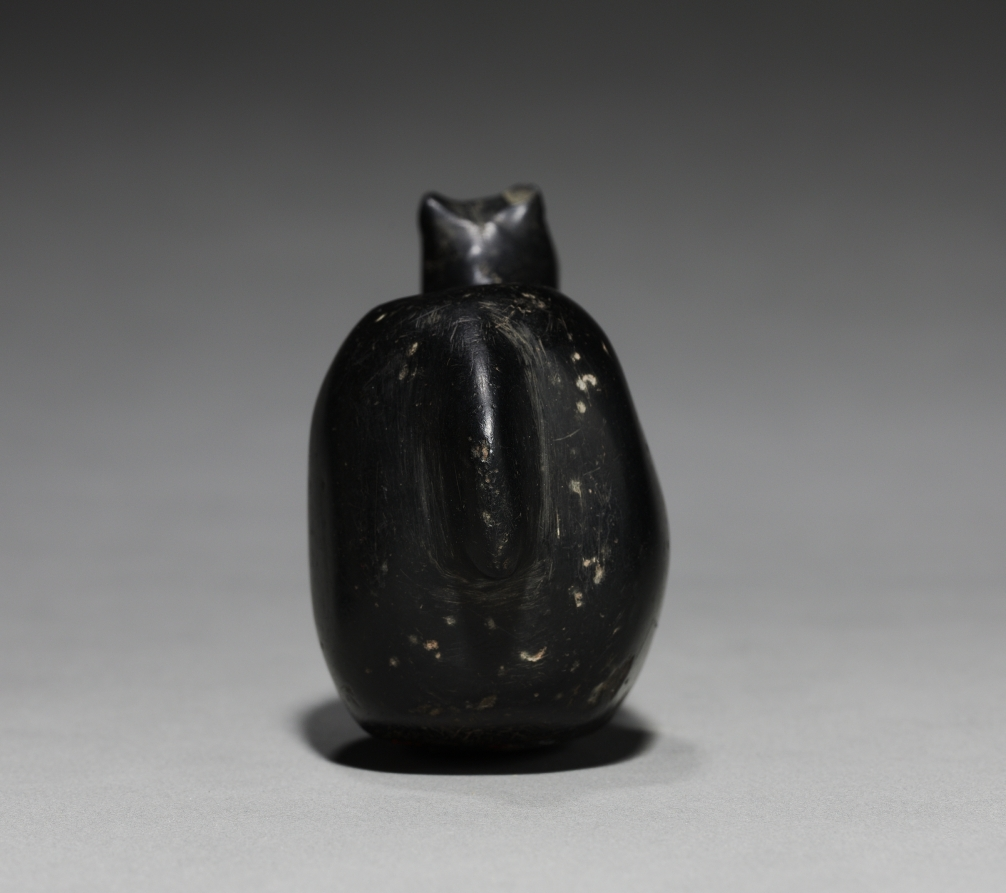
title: Alpaca Offering Container (Canopa)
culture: Peru, Inka style (1400-1532)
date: 1400–1532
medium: stone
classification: Stone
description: An unknown substance was placed in the back cavity of this alpaca before it was buried as an offering.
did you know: This stone llama was an offering buried to ensure health and fertility for domestic animals.